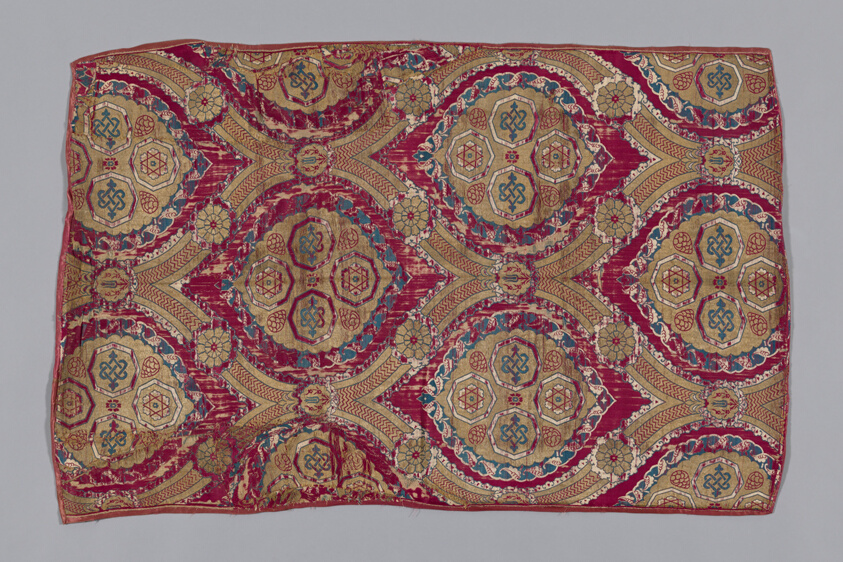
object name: Textile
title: Panel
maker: Turkey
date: 16th century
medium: Silk; brocaded in elaborate interlacing forms filled with octagonal shapes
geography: Turkey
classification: textile; weaving